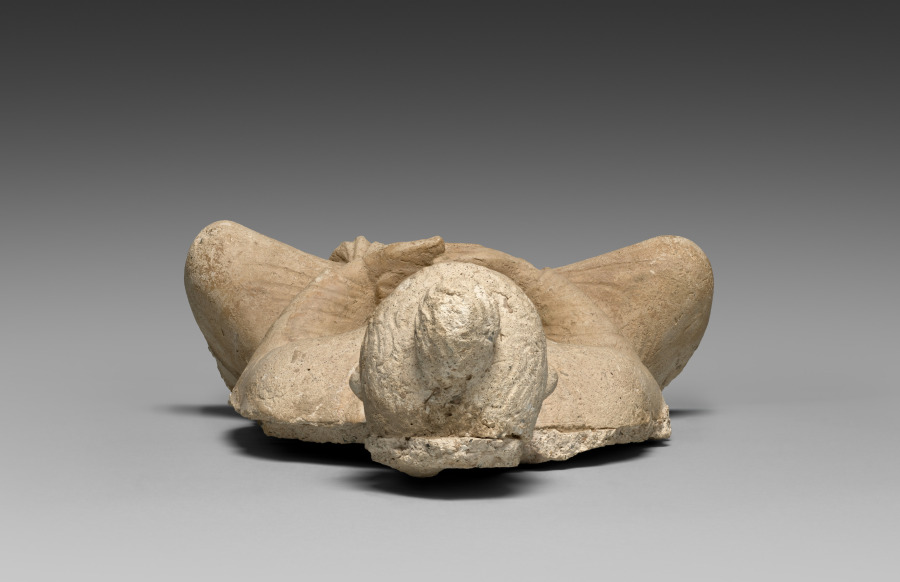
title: Seated Buddha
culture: Afghanistan, Hadda, probably Tape Shotor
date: c. 300 CE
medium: stucco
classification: Sculpture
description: Multiple images of seated Buddhas and related figures surrounded monuments called stupas that enshrined sacred relics. Made of stucco, which is a lime-based plaster material, the backs of the sculptures were fixed to the platform on which the hemispherical stupa was constructed. Visitors would see these images as they venerated the stupas by walking around them reverently, in a clockwise direction. The main stupa at Hadda reportedly contained relics of Shakyamuni Buddha, also known as Siddhartha Gautama, the founder of the Buddhism.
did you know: The way the Buddha holds his hands on his crossed legs indicates that he is shown in meditation.